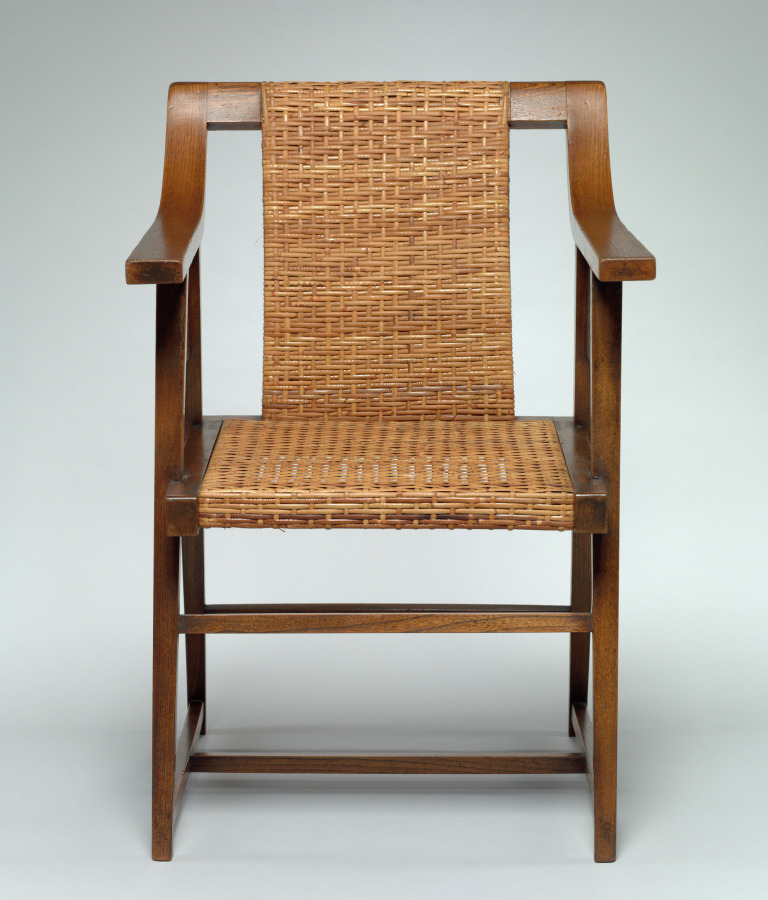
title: Armchair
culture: Austria, Vienna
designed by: Hans Vollmer (Austrian, 1879-)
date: c. 1904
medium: oak with replacement upholstered slip seat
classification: Furniture and woodwork